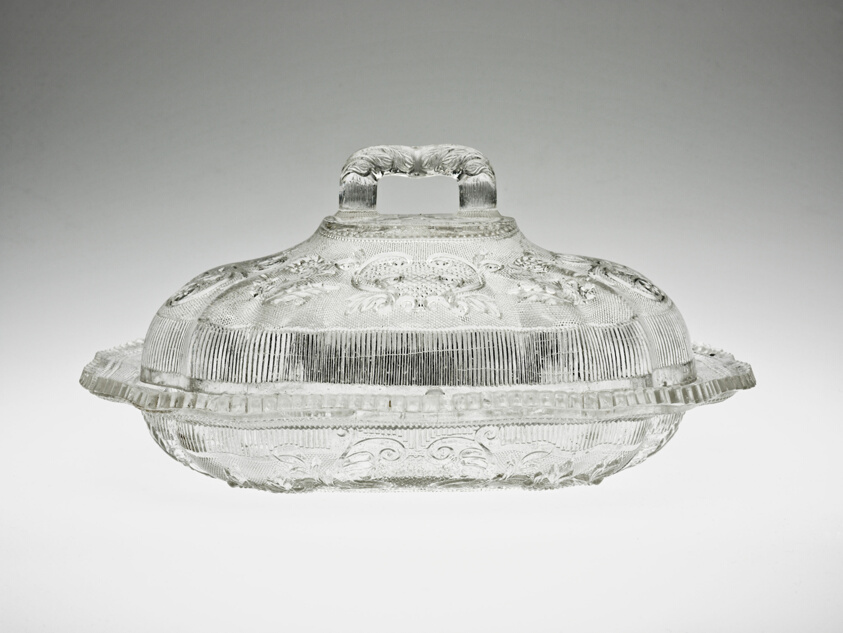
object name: Glass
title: Covered Dish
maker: Boston and Sandwich Glass Company; American, 1825–1888; Sandwich, Massachusetts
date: 1835–40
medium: Pressed glass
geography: Sandwich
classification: dish (vessel); american decorative arts; decorative arts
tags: dining, drinking